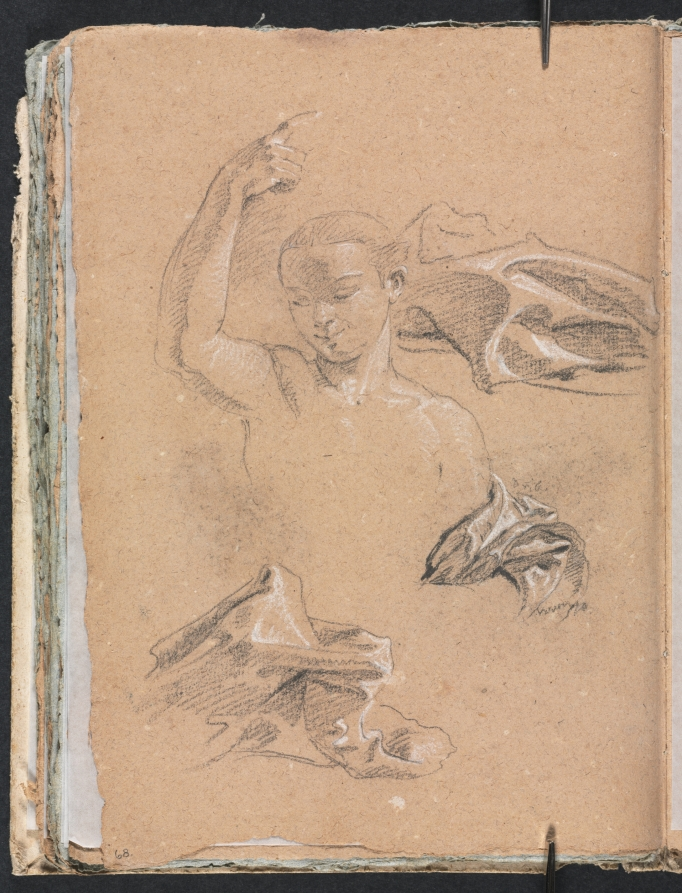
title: Verona Sketchbook: Figure with upraised right arm and drapery studies (page 68)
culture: Italy, 18th century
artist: Francesco Lorenzi (Italian, 1723–1787)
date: 1760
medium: black chalk with white heightening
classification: Bound Volume